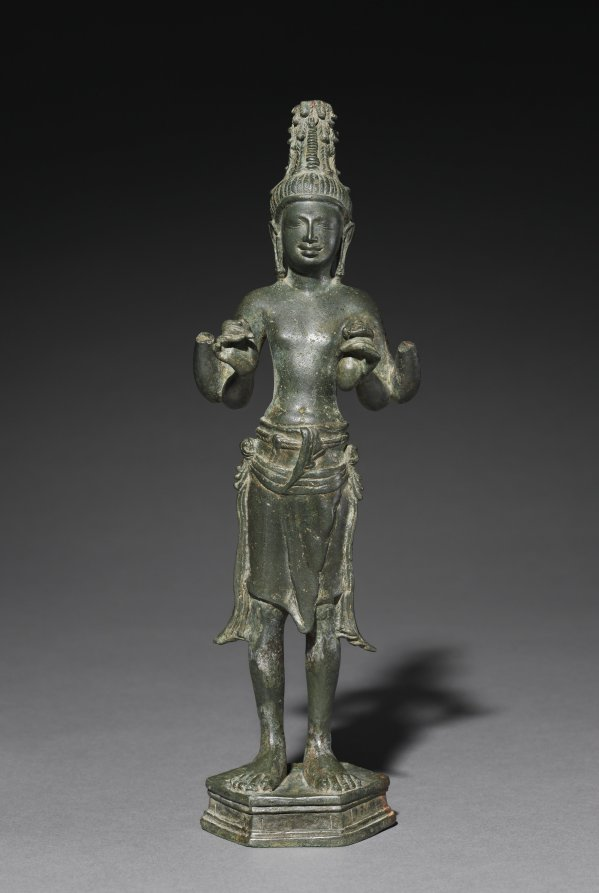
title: Maitreya: The Buddha of the Future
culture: Cambodia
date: 600s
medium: bronze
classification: Sculpture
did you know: The slender fingers of the left hand hold a water pot while the right hand is in the gesture of the vitarka mudra, a gesture of explanation and exposition.